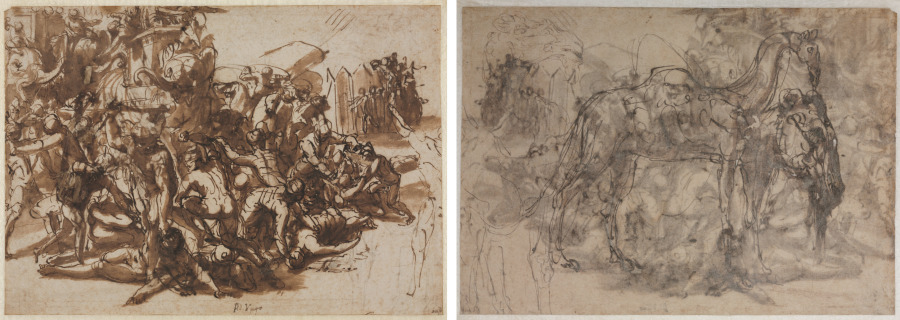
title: Poros Assailed by the Macedonian Army (recto); Sketches of Animals (verso)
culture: Italy, 16th century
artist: Perino del Vaga (Italian, 1501–1547)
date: c. 1545/47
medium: pen and brown ink (iron gall) and brush and brown wash; framing lines in gold paint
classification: Drawing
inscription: recto: lower center, in brown ink: P.d Vago ; lower right, in brown ink: aud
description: Perino del Vaga made this spirited pen and ink and wash drawing as a preliminary sketch for a fresco cycle depicting the military campaigns of Alexander the Great, intended for the apartments of Pope Paul III in the Castel Sant’Angelo in Rome. At the time, he was also working on commissions at the Vatican Palace where he studied and drew from the frescoes of Michelangelo in the Sistine Chapel. One pose in the drawing, that of the man in front who, sword poised over his head, prepares to strike a man below, was probably inspired by Michelangelo’s rendering of David and Goliath on the ceiling. Perino adapted the violent pose for a military rather than biblical subject, filling out the scene with trumpeting elephants and a pile of soldiers in combat. On the verso of the sheet, Perino drew a quick sketch of a standing camel and another, closer view of the animal's head and legs.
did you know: This artist was in Rome in 1527 when the troops of Charles V sacked the city, and was imprisoned and forced to pay a heavy ransom for his, his wife's, and his daughter's safe release.